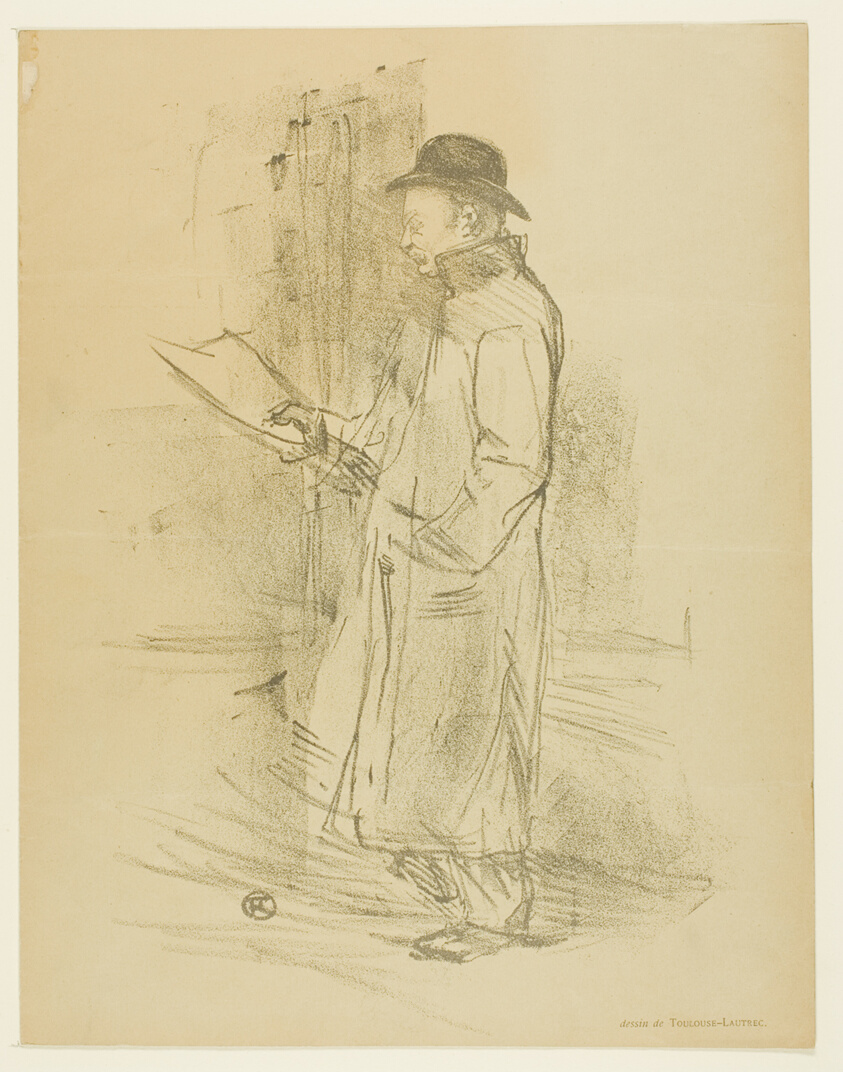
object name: Print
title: Program for the Gémier Benefit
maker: Henri de Toulouse-Lautrec (French, 1864-1901)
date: 1897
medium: Lithograph with text added, in dark gray on gray-brown wove paper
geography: France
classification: lithograph; print; prints and drawing